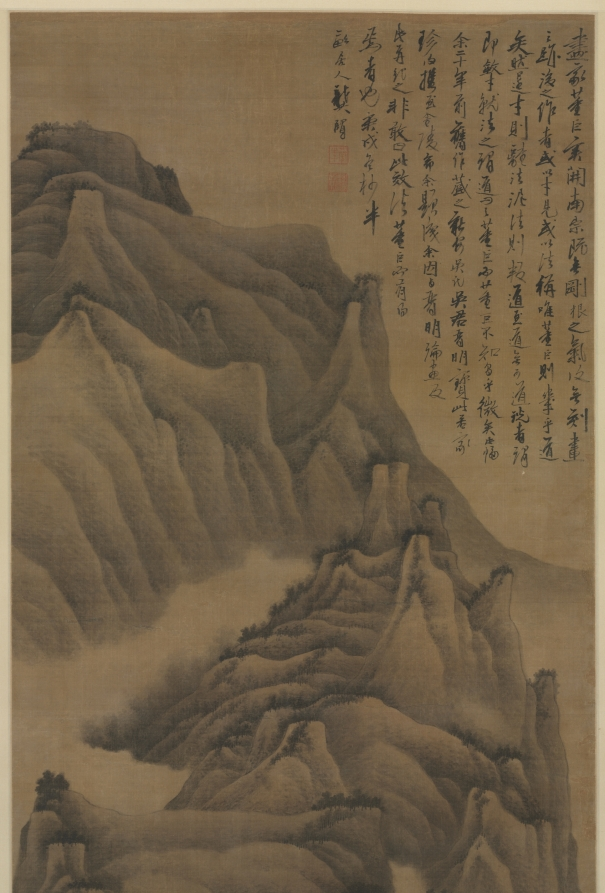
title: Landscape in the Style of Dong Yuan and Juran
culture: China, Qing dynasty (1644-1911)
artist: Gong Xian (Chinese, 1599–1689)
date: c. 1650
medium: hanging scroll, ink with white pigment on silk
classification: Painting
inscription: 畫家董巨，實開南宗。既無剛根之氣，復無刻畫之跡。後之作者或以才見，或以法稱。唯董巨則幾乎道矣。然逞才則離法，泥法則叛道。至道無可道。說者謂即歛才就法之謂道。問之董巨，而董巨不知，忽乎微矣。此幅余二十年前舊作。藏之新安吳氏。吳君晉明寶之若家珍。後携之金陵。命余題識。余因與晉明論畫及此，并紀之。非敢曰此效法董巨而有得焉者也。 庚戌冬杪半畝居人龔賢。 [印]龔半千; 野遺賢; [左下]龔賢; [上]可能另有龔賢一印。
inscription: 2 additional seals of Cheng Qi 程琦 (1911–1988)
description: Towering peaks and unfolding ranges are piled up and overlaid with layer after layer of brushwork to give an overall dense, dark, and even melancholic effect. Gong Xian created a personal style of landscape, which departed greatly from his models Dong Yuan and Juran. The tension between tradition and individuality had been a topic of interest for the Chinese artist. As Gong Xian writes in his inscription: "Painters of later periods may be known for their natural talents or praised for their observance of established traditions. . . . However, those who indulge in showing off their talent will deviate from the tradition, while those who adhere to tradition will alienate themselves from the Dao. The supreme Dao is inexplicable in words. . . ."